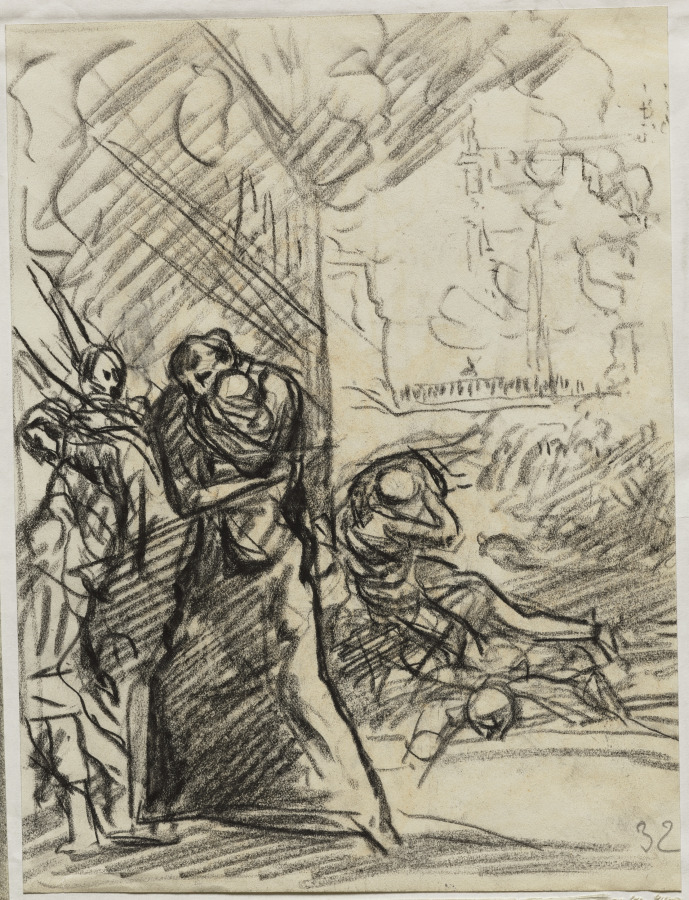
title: L'Incendie de Louvain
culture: France, 20th century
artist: Auguste Louis Lepère (French, 1849–1918)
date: 1914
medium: pen and brush and black ink with white highlights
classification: Drawing